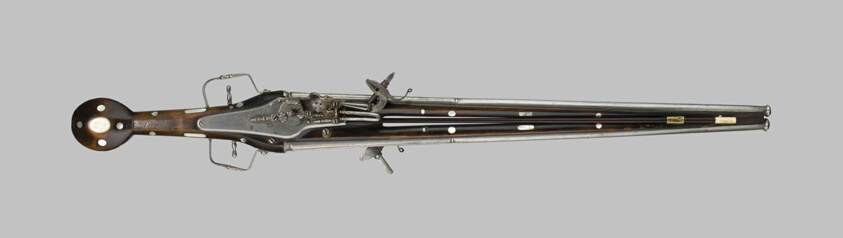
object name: Arms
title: Double-Barreled Holster Pistol with Two Locks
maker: German, Nuremberg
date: c. 1610/20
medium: Wood, mother-of-pearl, and iron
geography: Nuremberg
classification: firearm-handgun; arms; arms and armor